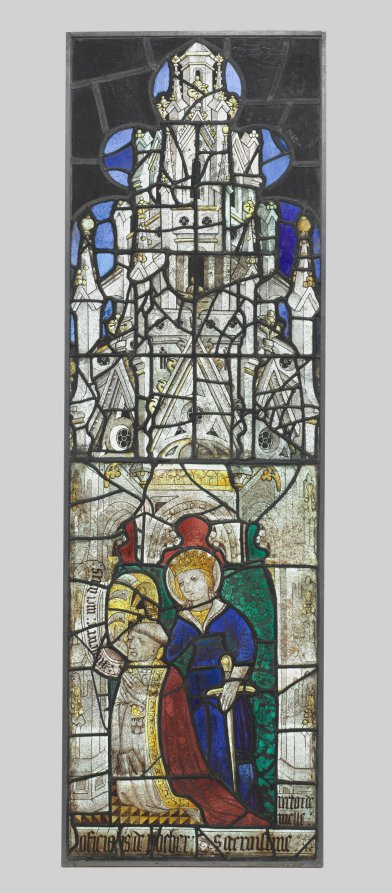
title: Saint Catherine with a Kneeling Male Donor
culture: France, Poitou, Melle, 15th century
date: 1400s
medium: pot metal, white glass with silver stain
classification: Glass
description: This panel was originally part of a much larger composition. Saint Catherine stands behind a donor, a cleric, who faces a missing scene representing either the Crucifixion or the standing Virgin, which would have formed the object of the donor’s devotion. In the lower right corner an inscription identifies the donor as rector de Melle, a clergyman in charge of the parish of the town of Melle in western France. The panel must have been commissioned for a church in this town with which the donor was affiliated. A scroll near the donor reads Miserere mei deus (God have mercy on me).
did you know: When donors commissioned art during the medieval period, they often requested their image to be included alongside the divine figures. This anonymous kneeling figure paid for this stained glass window, creating a visual reminder of his generosity and piety.